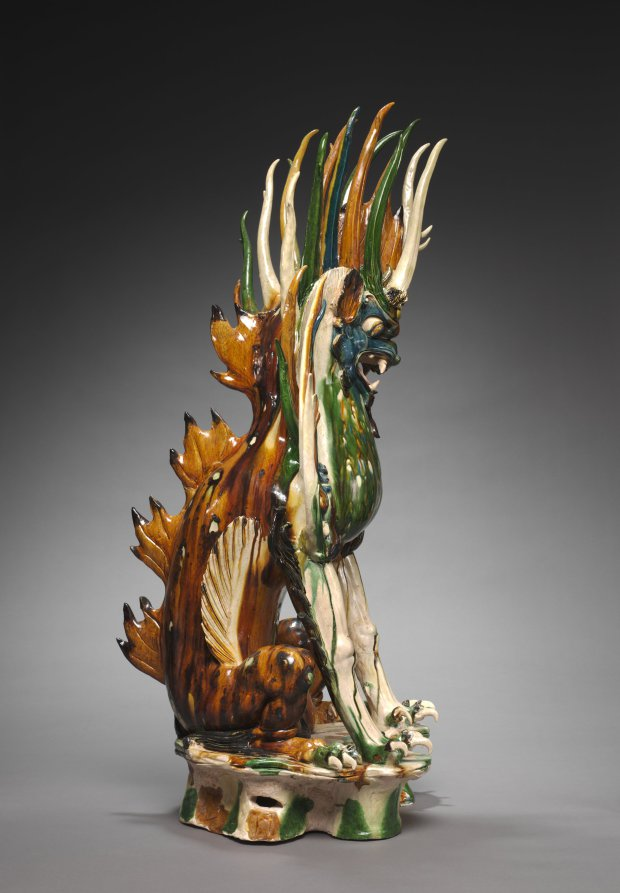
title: Tomb Guardian with Animal Head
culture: China, probably Shaanxi province, Xi'an, Tang dynasty (618-907)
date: early 700s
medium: glazed earthenware, sancai (three-color) ware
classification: Ceramic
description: With their fierce expressions and exaggerated physical features, fantastic guardian creatures were intended to guard the entrance to a tomb, warding off evil as well as keeping the soul of the deceased from wandering. Known as "earth spirits" or qitou, this one has an animal face and a pair of antlers growing above its eyebrows; the other sports a human face with huge protruding ears and a short horn surrounded by fiery, twisting hair. Their many elongated spikes heighten the fearful intensity. Before tomb sculptures were placed in the tomb, they were carried through the streets in a funerary procession. Funerary gifts provided the deceased with means for the afterlife. They were also an expression of filial piety and demonstrated the wealth and power of the descendants.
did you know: Sancai (three-color) glazes in green, amber, and transparent white, plus expensive cobalt blue glaze, show the high social status of the tomb’s occupant.